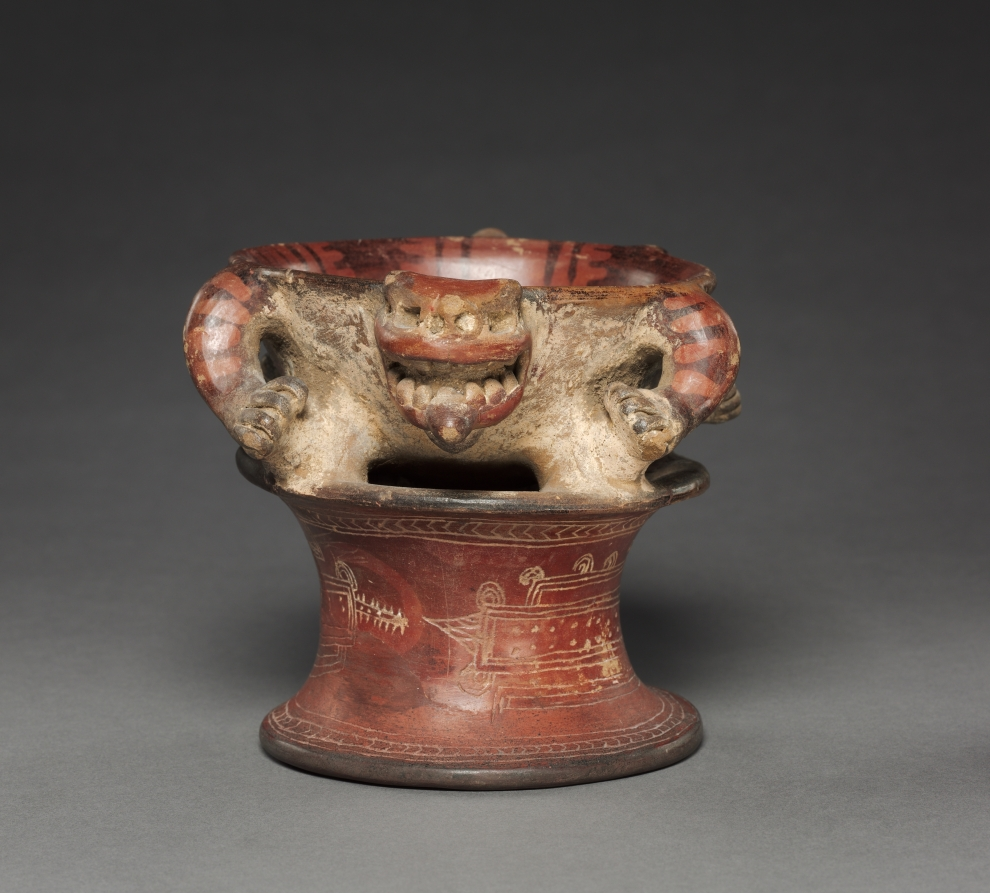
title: Jaguar Bowl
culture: Colombia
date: c. 850–1500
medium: resist-painted earthenware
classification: Ceramic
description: Probably from the southern highland region of Colombia, this unusual vessel has a bowl in the form of a comically fierce jaguar, mounted atop a pedestal base.